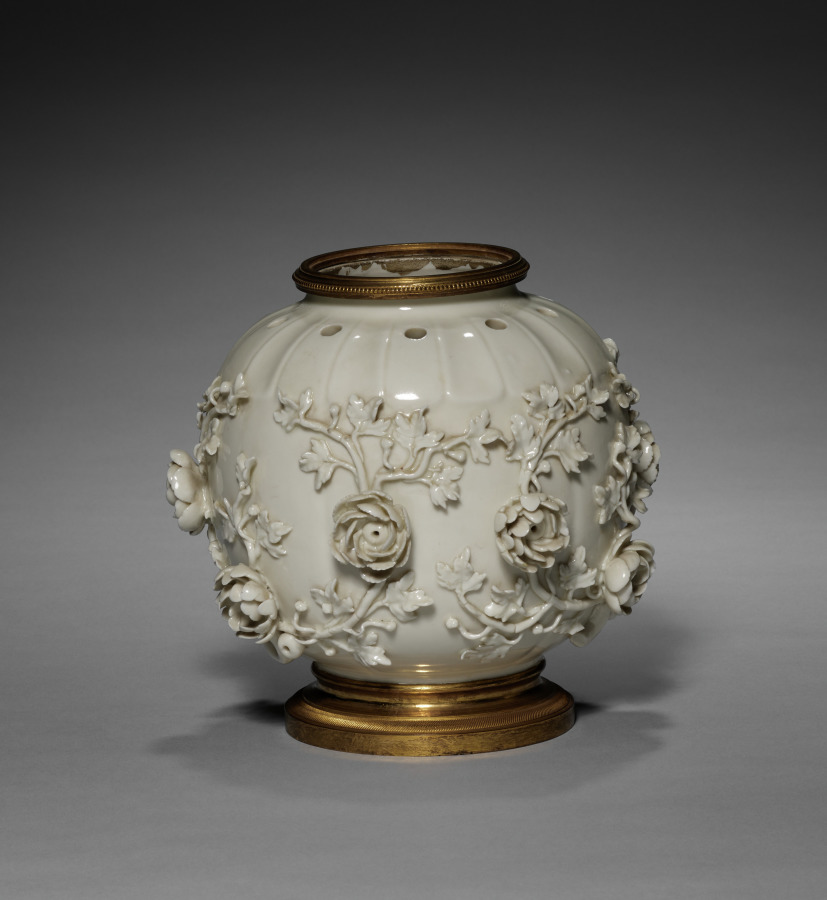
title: Potpourri Vase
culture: France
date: 1860–80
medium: blanc-de-chine porcelain; gilt bronze mount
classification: Ceramic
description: This vase--part of a pair of covered vases--was created to contain potpourri, a mixture of flowers, herbs, and spices emitting ambient fragrance. This specific function offered a particularly fertile ground for the development of French porcelain from the mid-1700s, as manufactories experimented with forms, surface ornamentations, and placement of perforations. Produced by the firm of Edmé Samson in the 1800s, the vases pay homage to this history. While using updated technique and material, as well as more exuberant decorations, these vases draw upon designs by earlier innovators such as the Saint-Cloud manufactory.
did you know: Potpourri vases always have holes in the top to let the scent of dried spices and flowers contained within freshen the air around them.